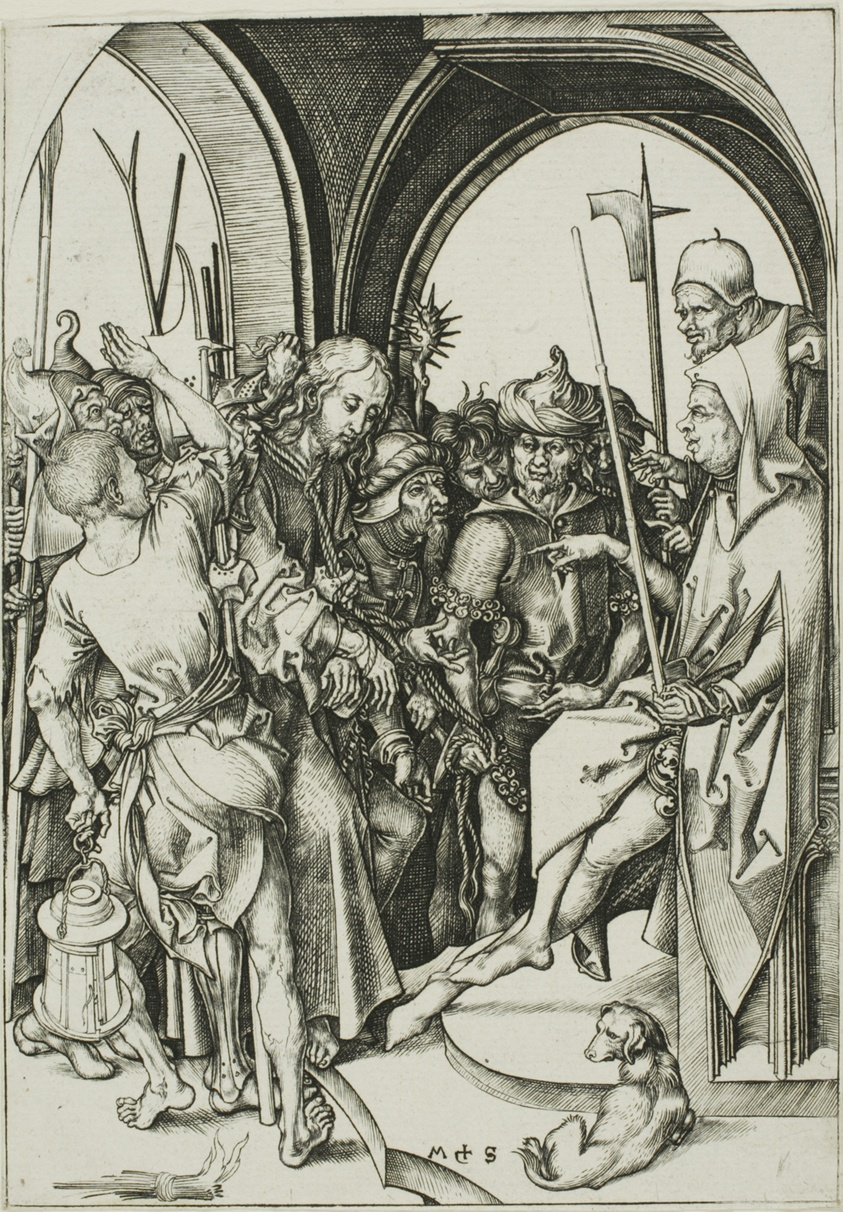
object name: Print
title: Christ Before Annas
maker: Martin Schongauer (German, c. 1430/50-1491)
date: c. 1480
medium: Engraving on paper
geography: Germany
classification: engraving; print; prints and drawing